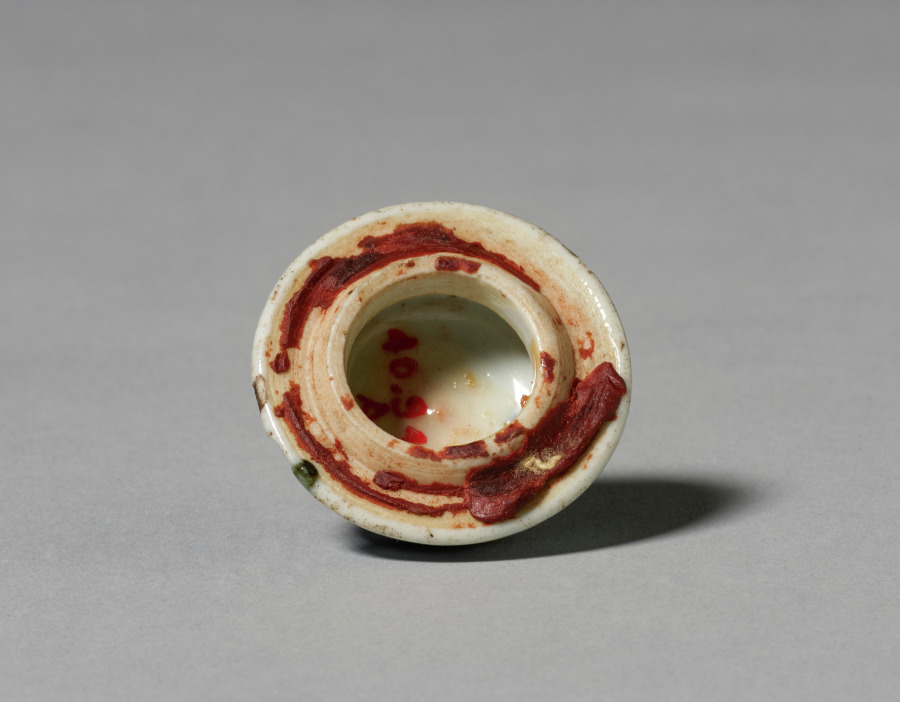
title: Jar with Cover (lid)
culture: China, Qing dynasty (1644-1911)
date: 19th Century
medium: porcelain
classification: Ceramic